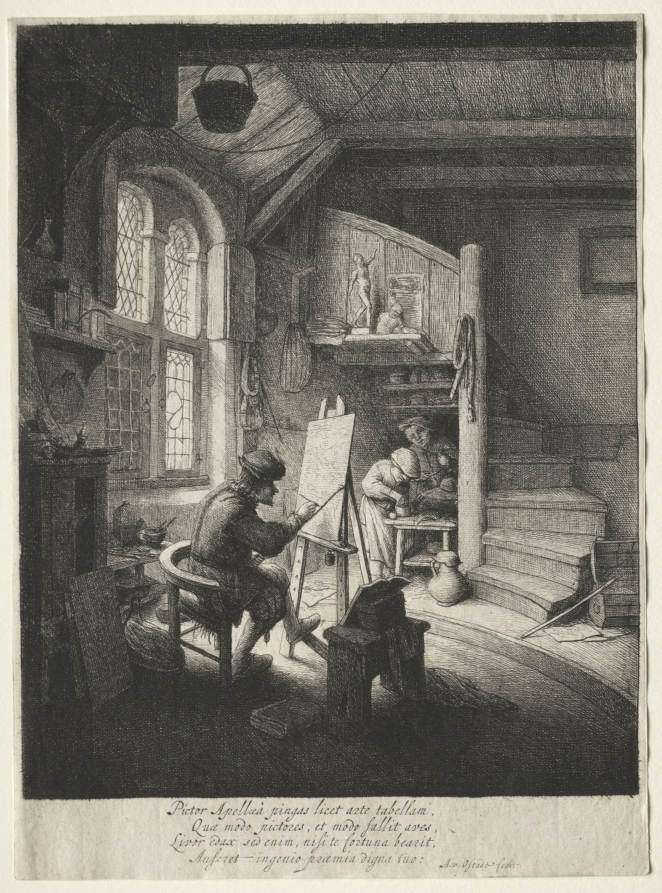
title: The Painter's Studio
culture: Netherlands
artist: Adriaen van Ostade (Dutch, 1610–1684)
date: 1647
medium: etching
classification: Print